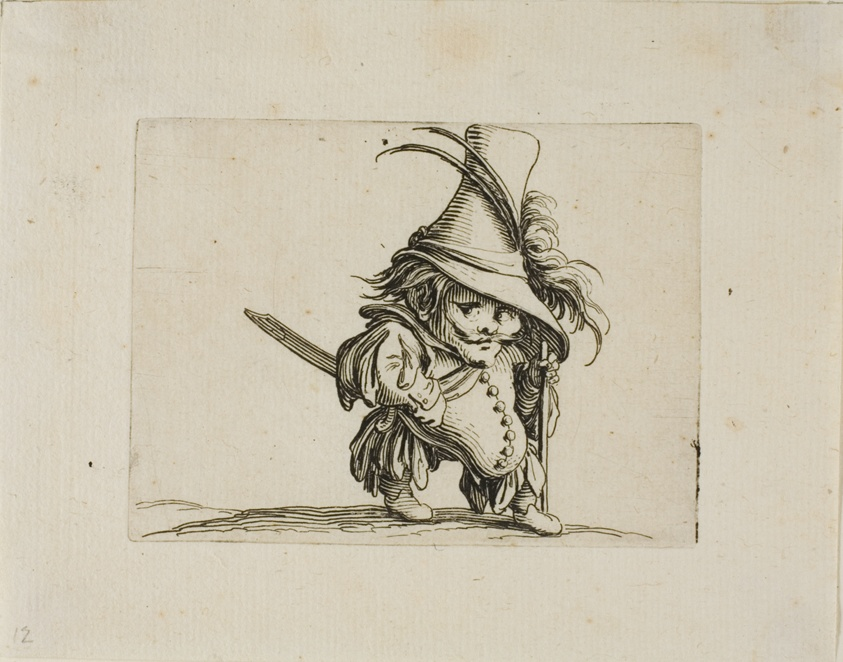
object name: Print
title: The Potbellied Man with a Tall Hat, from Varie Figure Gobbi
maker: Jacques Callot (French, 1592-1635)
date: 1616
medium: Etching on paper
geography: France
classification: etching; print; prints and drawing